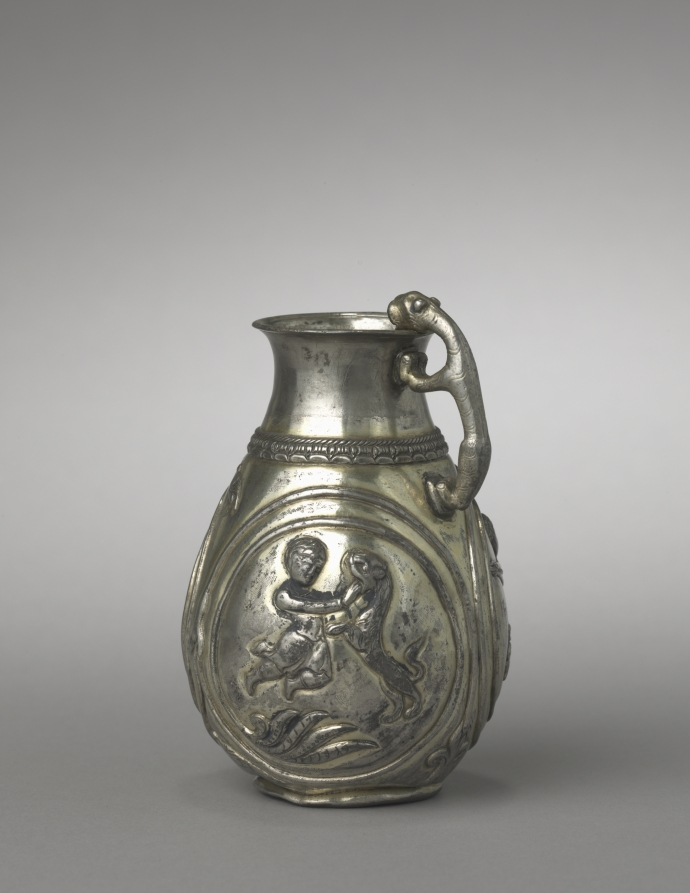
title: Hunt Pitcher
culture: Iran, Sasanian Empire (224–651 CE)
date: 500–600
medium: silver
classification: Metalwork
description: Every good Zoroastrian was supposed to spend one-third of his day farming; one-third philosophizing; and one-third eating, resting, and at pleasure. The abundance of Sasanian luxury goods is evidence of the importance accorded the last third of the day.